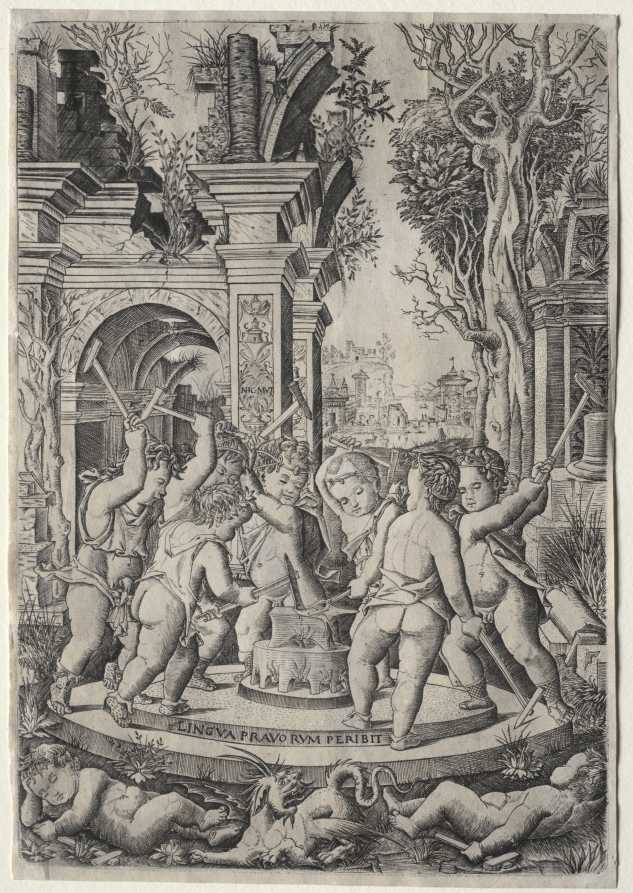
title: The Fate of the Evil Tongue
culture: Italy, 16th century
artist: Nicoletto da Modena (Italian, active c. 1500–1520)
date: c. 1507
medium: engraving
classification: Print